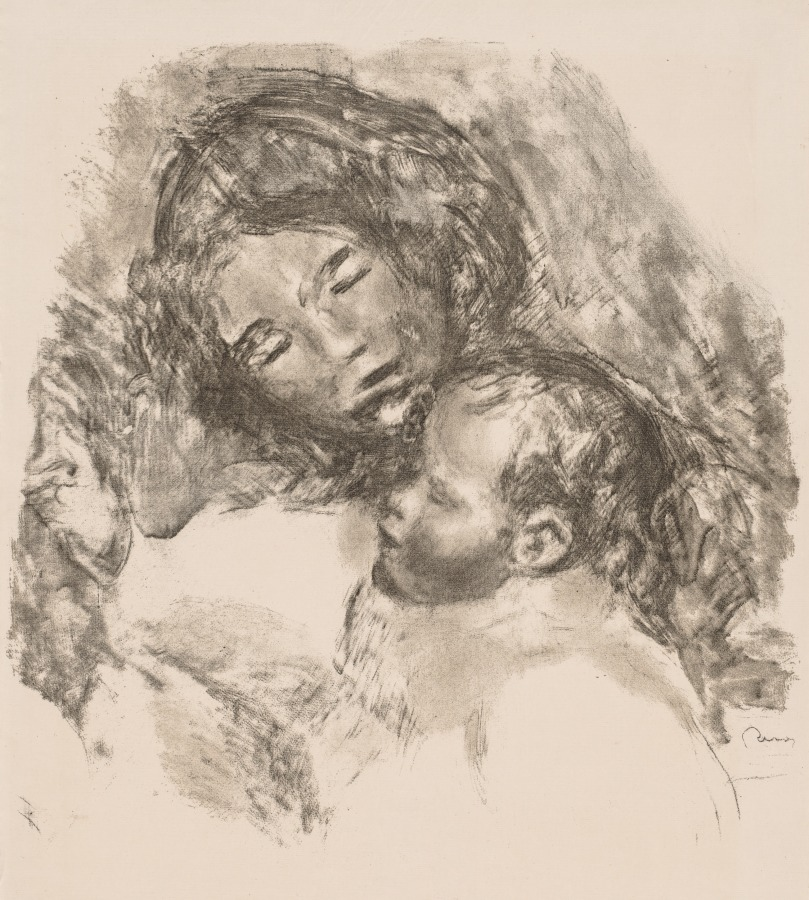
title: Motherhood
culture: France, early 20th Century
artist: Pierre-Auguste Renoir (French, 1841–1919)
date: c. 1912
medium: lithograph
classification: Print